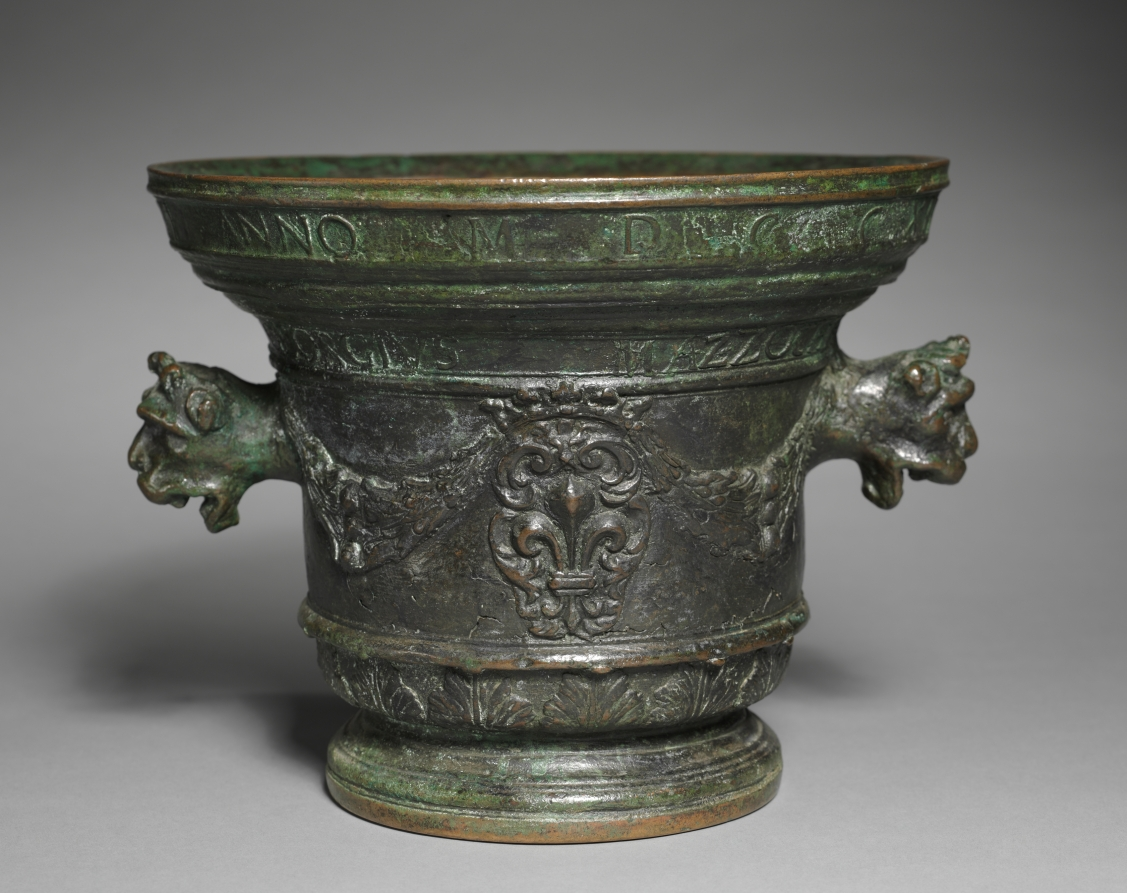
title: Mortar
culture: Italy, 18th century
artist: Georgius Mazzochus (Italian)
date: 1712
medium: bronze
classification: Sculpture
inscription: Inscription on obverse: "ANNO M D C C XII / GEORGIUS MAZZOCHUS / (fleur-de-lis)" Insciption on reverse: "FRANC I . PLAC ET PAR DUX VII / FECIT / (crowned shield with 6 fleur-de-lis)"